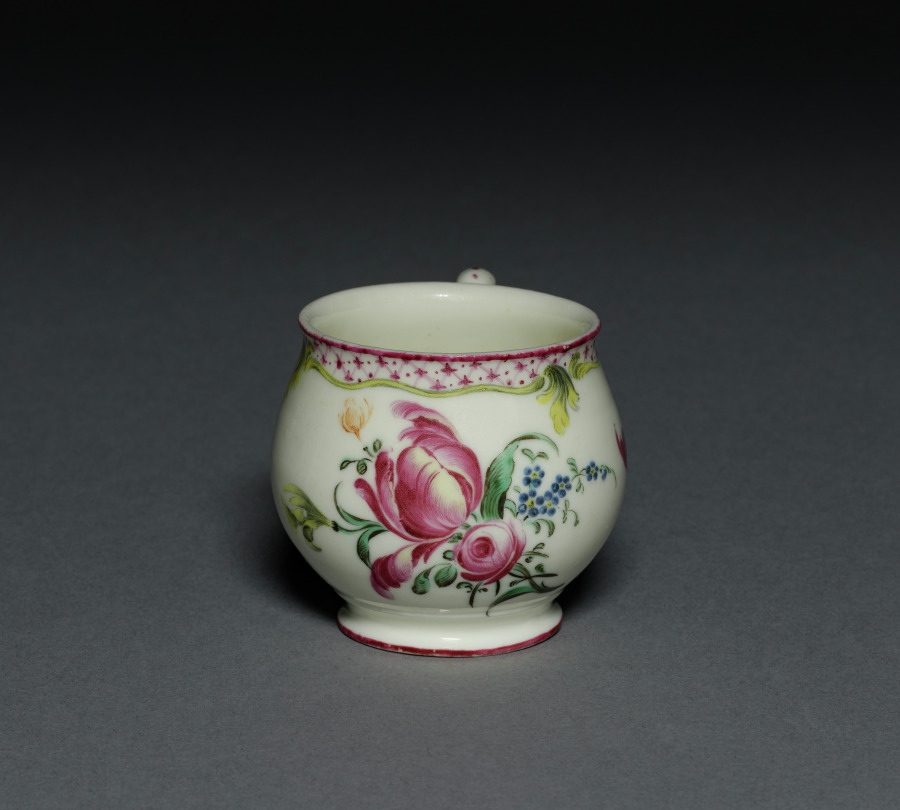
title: Custard Cup (pot à jus)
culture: France, Mennecy, 18th century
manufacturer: Mennecy- Villeroy Factory (French)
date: c. 1750–55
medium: soft-paste porcelain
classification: Ceramic